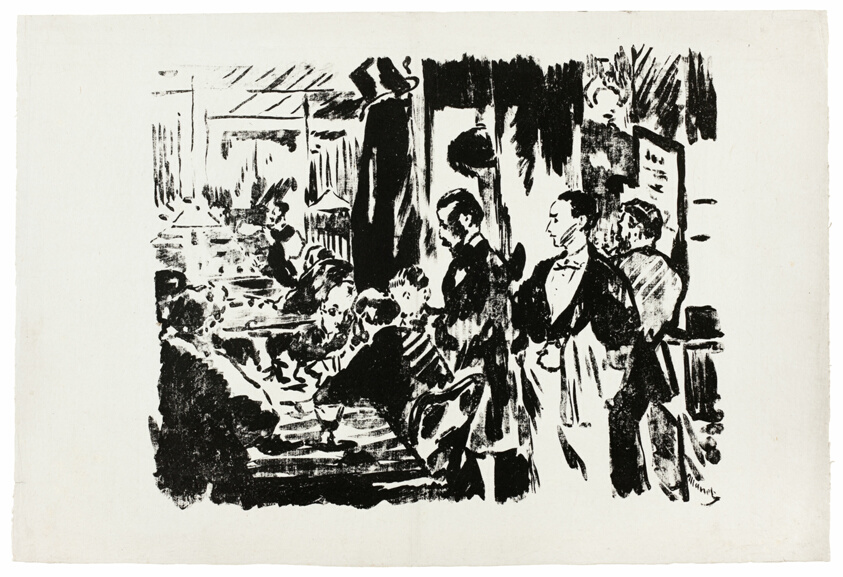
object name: Print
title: At the Café (unpublished plate)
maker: Édouard Manet (French, 1832-1883); printed by Lefman et Compagnie (French, 19th century)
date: 1874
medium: Gillotage in black on ivory China paper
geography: France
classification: relief etching; print; prints and drawing